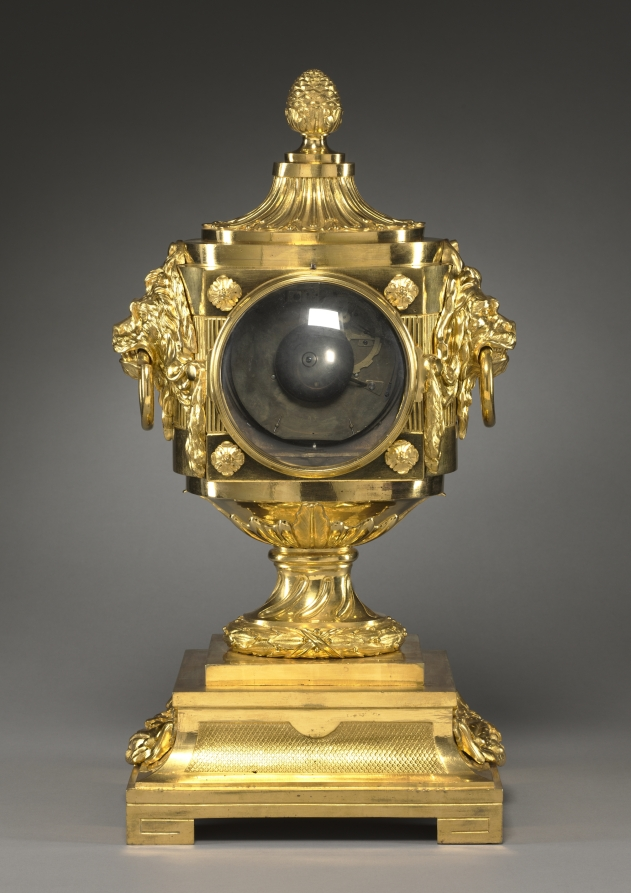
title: Clock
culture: France, 18th century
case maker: Robert Osmond (French, 1711–1789)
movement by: Robert Robin (French, 1742–1799)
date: c. 1785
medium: gilt bronze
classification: Furniture and woodwork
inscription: face of clock inscribed: "Robin ger Du Roi"